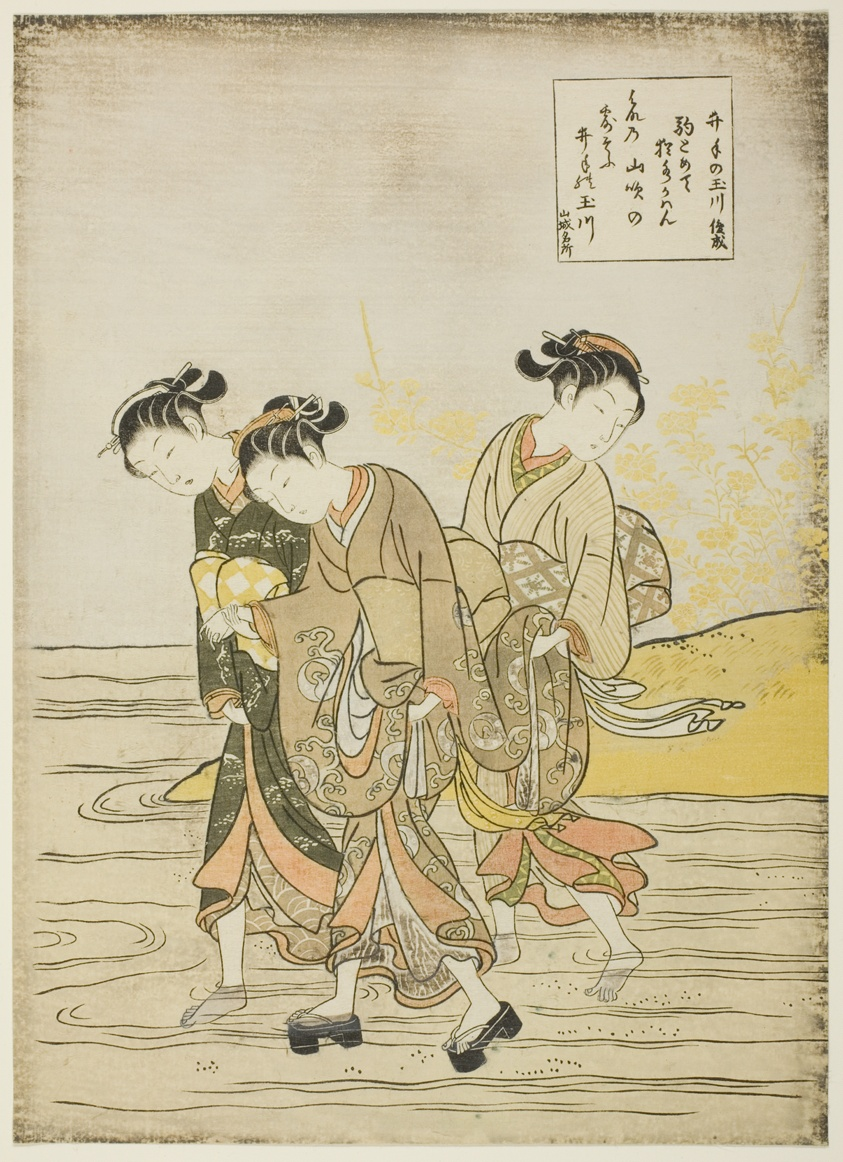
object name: Print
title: The Jewel River at Ide (Ide no Tamagawa), from an untitled series of Six Jewel Rivers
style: Japanese (culture or style)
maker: Suzuki Harunobu 鈴木 春信; Japanese, 1725 (?)-1770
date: c. 1767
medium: Color woodblock print; chuban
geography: Japan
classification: woodblock print; print; asian art